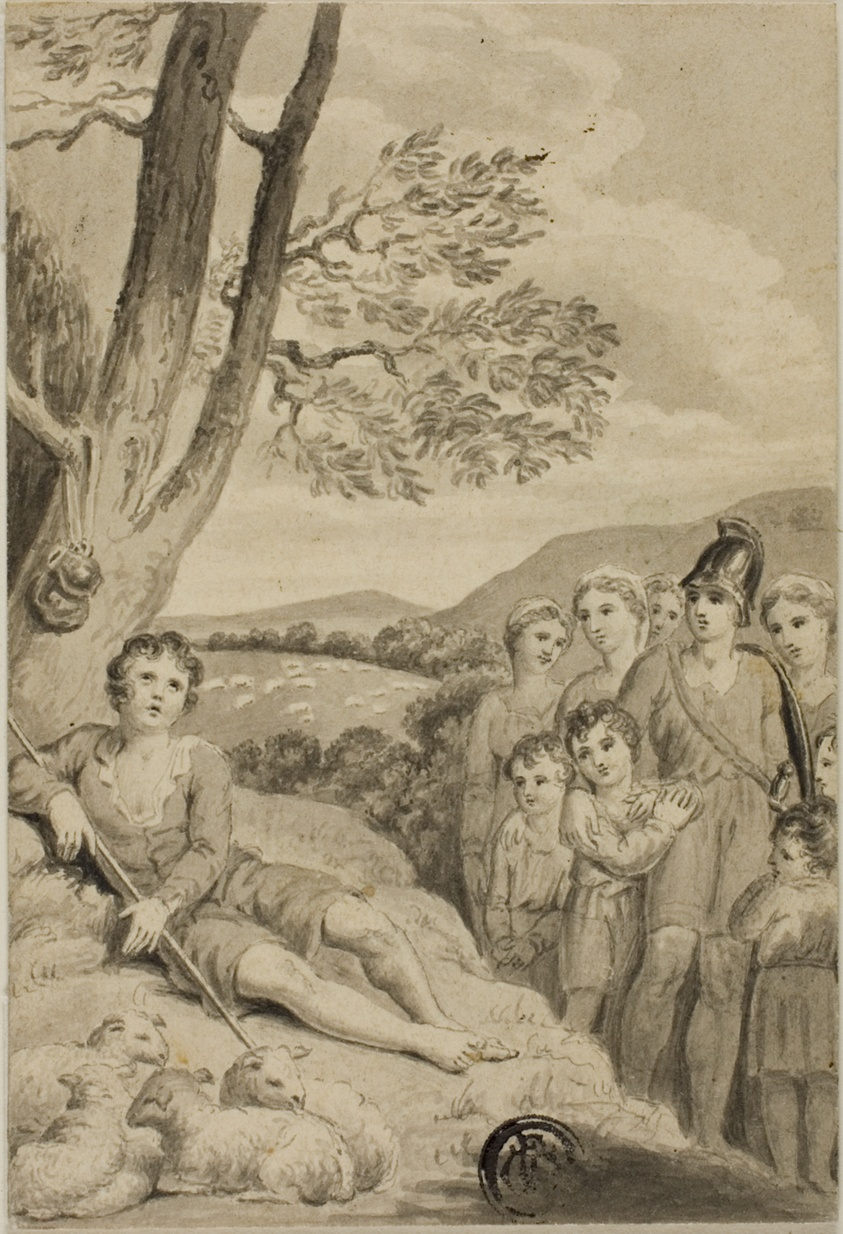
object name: Drawing and Watercolor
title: Shepherd Boy with Flock, Watched by Warrior, Women and Children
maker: Unknown Artist; European, n.d.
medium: Pen and black ink with brush and gray wash, on cream wove card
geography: England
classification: pen and ink drawings; drawings (visual works); prints and drawing